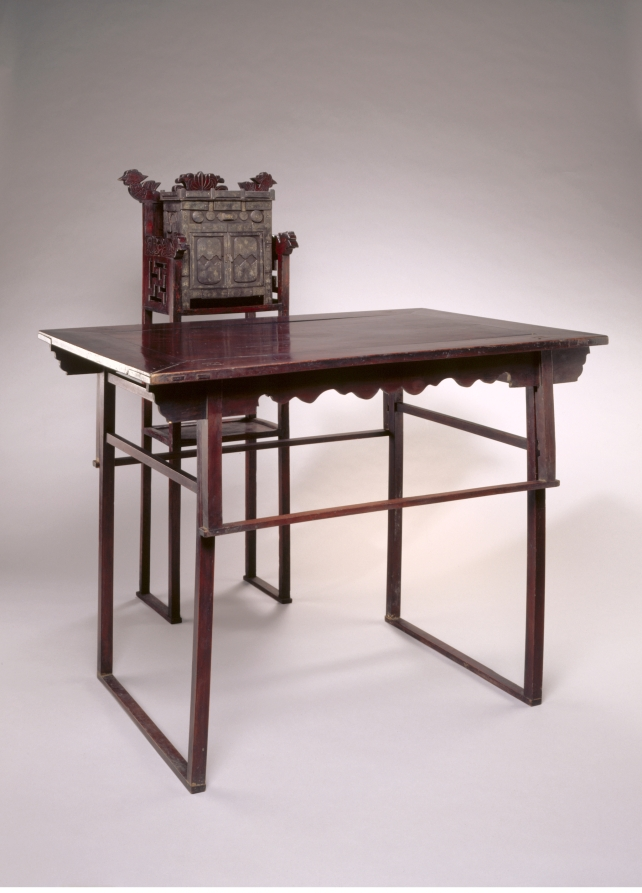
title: Spirit House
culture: Korea, Joseon dynasty (1392–1910)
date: late 1800s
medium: iron inlaid with silver and copper decoration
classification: Metalwork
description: This table, chair, and spirit house form a partial recreation of a memorial altar from the Joseon period. The spirit house and chair both include a number of auspicious symbols, including lotuses, conch shells, and chakra wheels. The spirit house would have been placed on the altar chair, and offerings would have been set out on the table for the memorial service. In ancestor veneration rituals, deceased parents or ancestors are sanctified as spirits who are believed to oversee their descendents. Three times a year, once at the lunar new year, once at the person’s death date, and once at the time of the mid-autumn festival, food would be placed on the table for the ancestors, including fruits, rice, meat, and rice wine. During these ceremonies the worshippers’ attitude was as reverential toward the objects meant to embody the ancestors’ spirits as that toward a living parent.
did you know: The belief in two types of souls, the spiritual and the corporeal, embodied the core concept of ancestor worship in traditional China and Korea. While the corporeal soul is believed to reside in the tomb, the spiritual soul, in the spirit house like this example, guards his or her decedents.